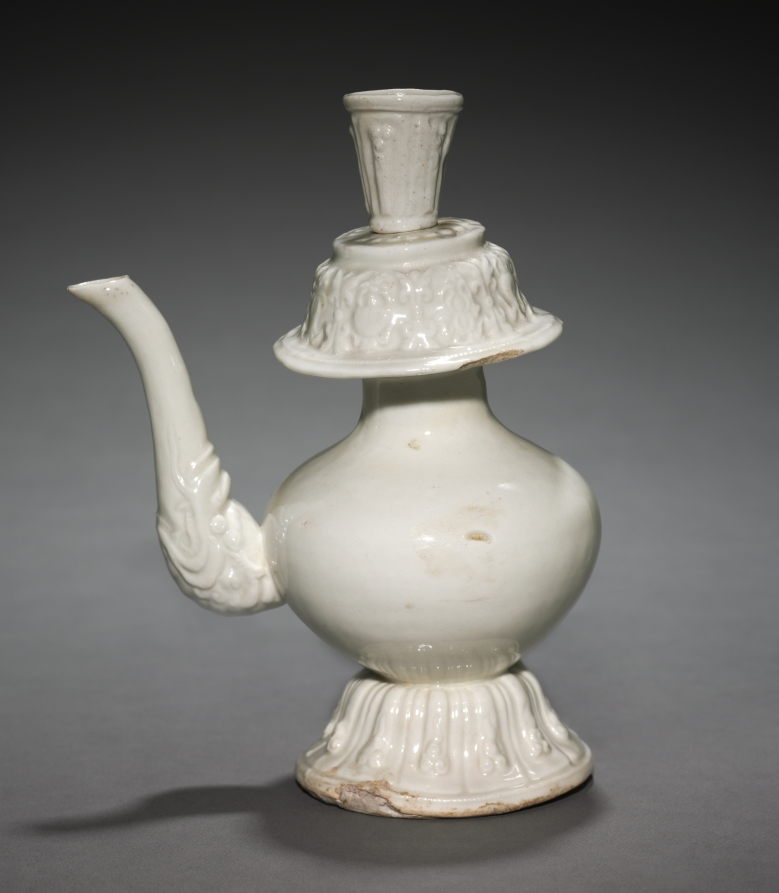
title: Ewer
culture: China, Yuan dynasty (1271-1368) - Ming dynasty (1368-1644)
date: 1300s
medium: porcelain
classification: Ceramic